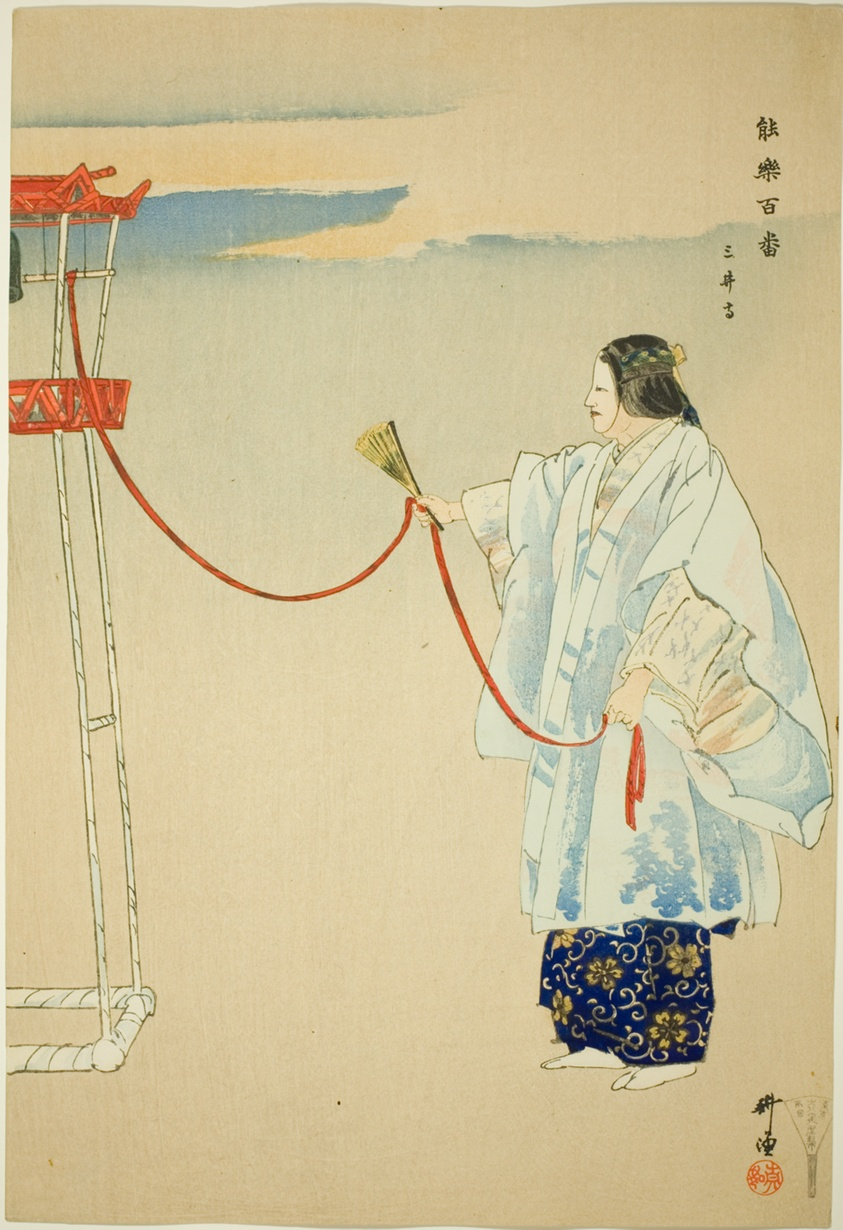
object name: Print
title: Miidera, from the series "One Hundred No Dramas (Nogaku hyakuban)"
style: Japanese (culture or style)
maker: Tsukioka Kogyo; Japanese, 1869-1927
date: 1898/1903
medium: Color woodblock print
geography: Japan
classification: woodblock print; print; asian art